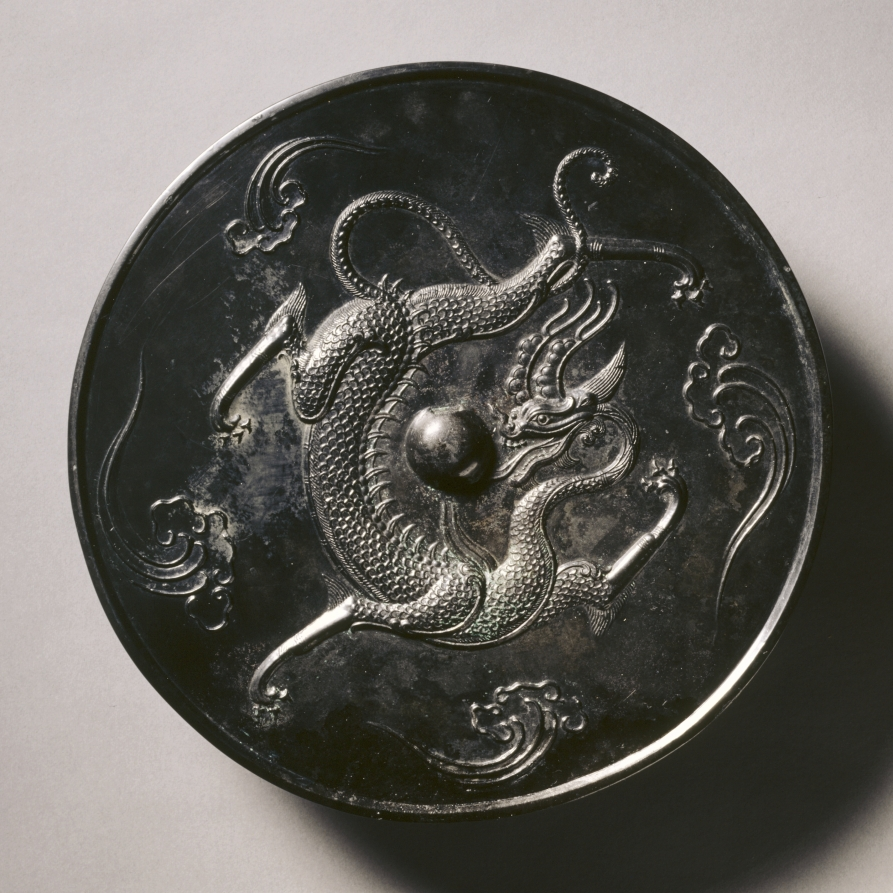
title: Mirror with a Coiling Dragon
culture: China, Tang dynasty (618-907)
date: 700s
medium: bronze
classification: Metalwork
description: Cast in high-tin and low-lead bronze by the lost wax method, this mirror has a dark and lustrous patina known as heiqigu (literally, “black lacquer antique”). It bears a design of a coiling dragon among trailing clouds. With a small, elongated head connecting to an S-curve of the neck that is as sinuous as the body and tail, the dragon of the Tang period is unique.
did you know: The patina of this mirror is known as heiqigu (literally, “black lacquer antique”).